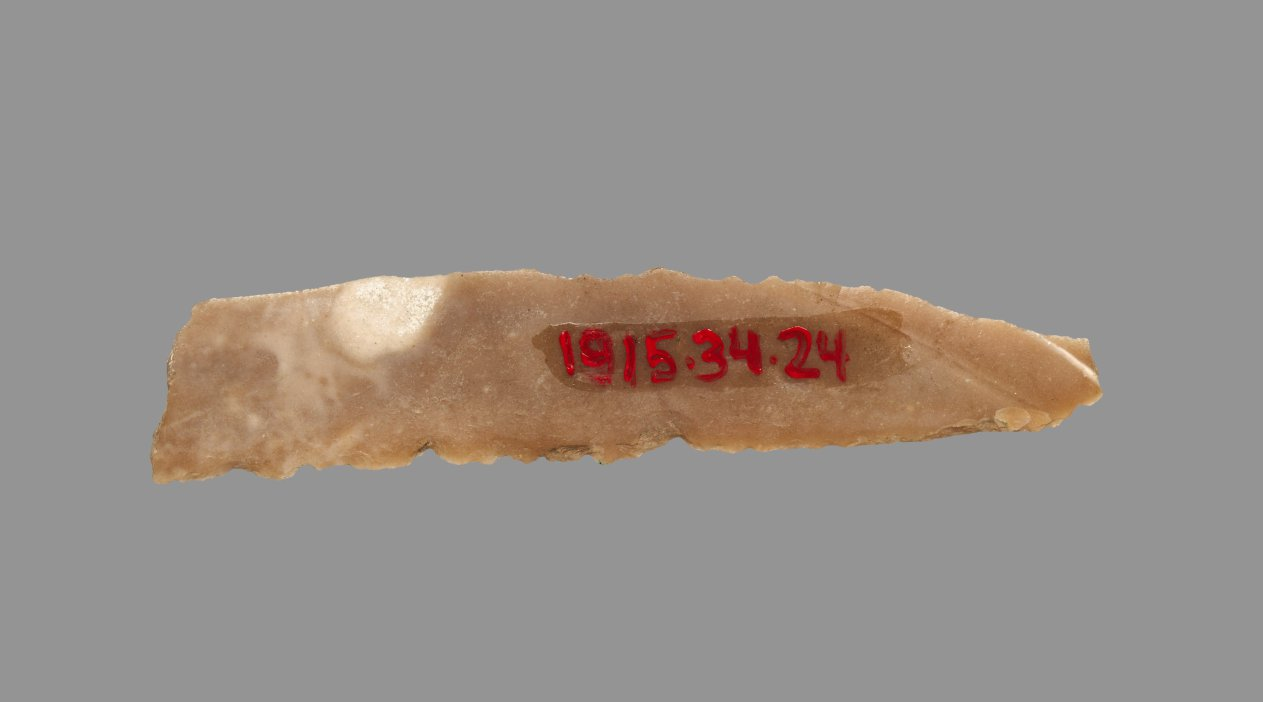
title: Sickle Blade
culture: Egypt, Middle Kingdom (2040–1648 BCE), Dynasty 12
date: 1980–1801 BCE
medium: flint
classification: Implements